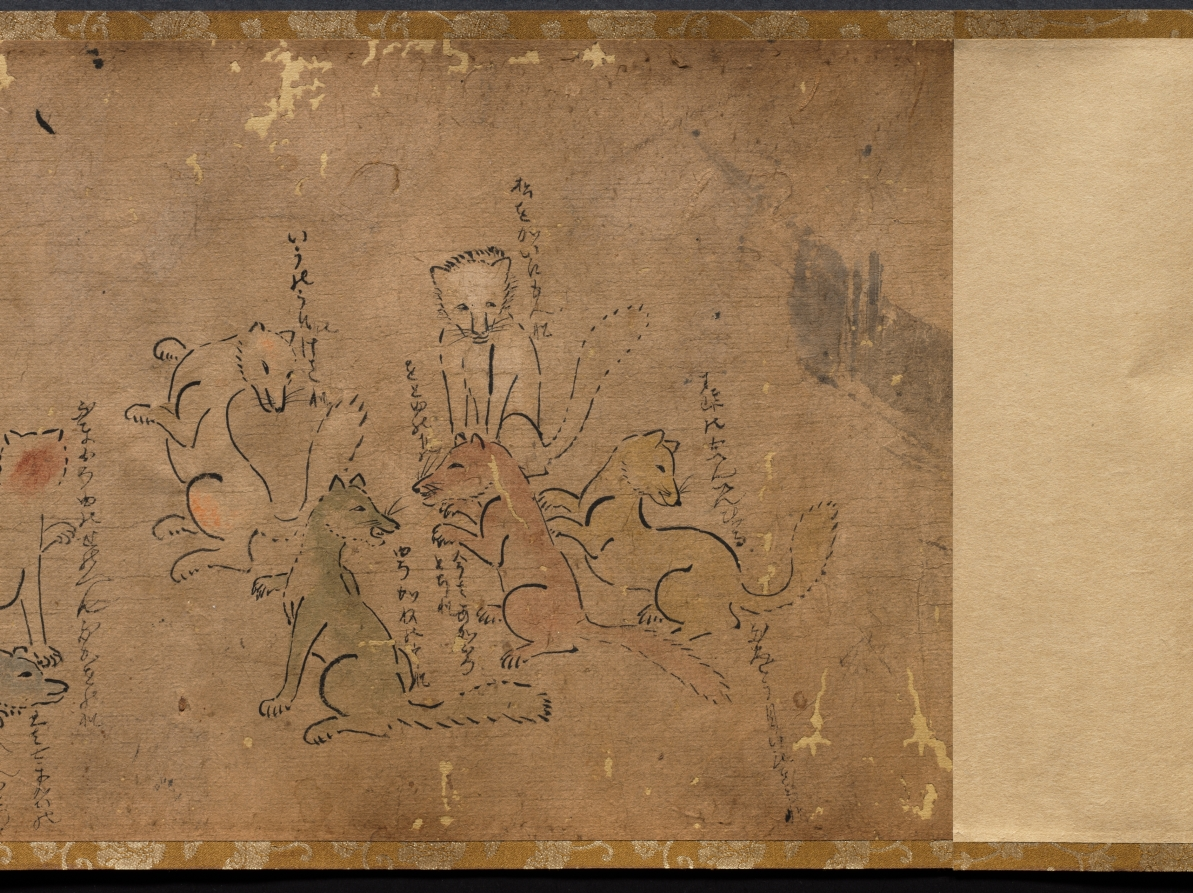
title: The Illustrated Tale of Oishi Hyōroku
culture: Japan, Edo period (1615–1868)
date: 1700s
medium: handscroll; ink and color on paper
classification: Painting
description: This incomplete handscroll illustrates part of the story of Oishi Hyoroku, a young man tasked with battling fox apparitions who were creating problems in his town. In other extant versions of the scroll, the story is set in the fall of 1624 in Kagoshima in southern Japan. Throughout the story, Hyoroku is tricked and terrified by the foxes that shift their shapes into a variety of monstrous phantoms. After repeated humiliations, he eventually captures two of the foxes. In this version, colloquial texts that function like text blurbs in comics appear throughout the scroll, but the main text is missing.